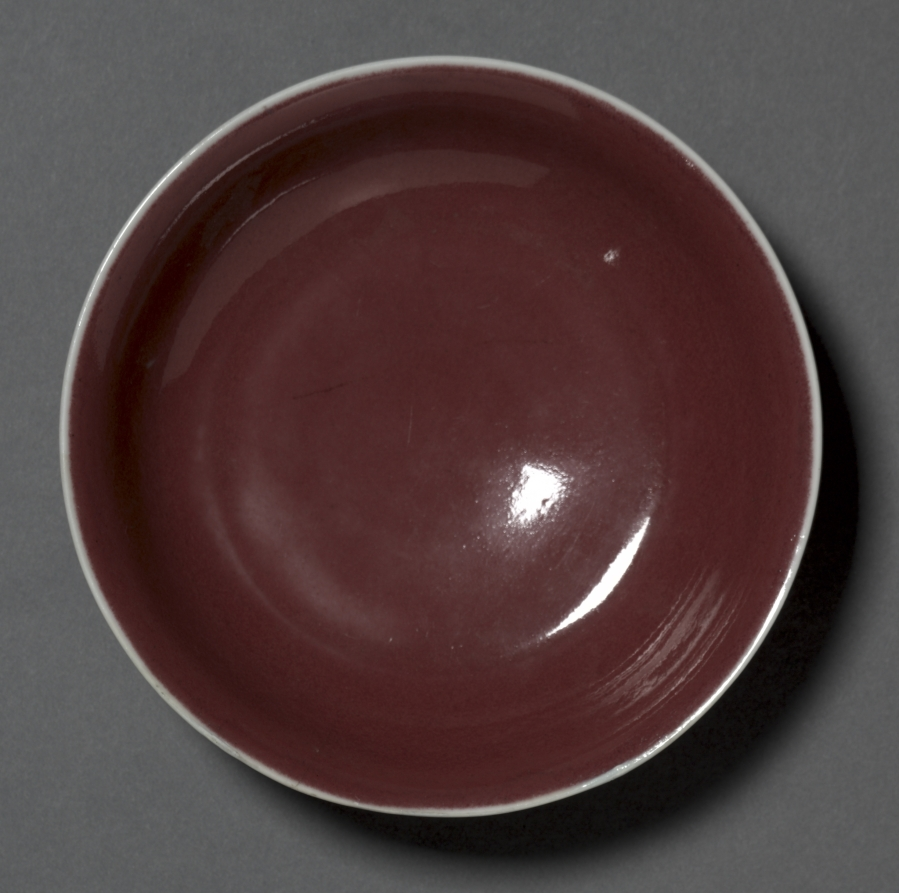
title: Dish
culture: China, Jiangxi province, Jingdezhen, Ming dynasty (1368-1644), Xuande mark and period (1426-1435)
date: 1426–35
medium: porcelain with copper-red glaze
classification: Ceramic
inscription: 大明宣德年製